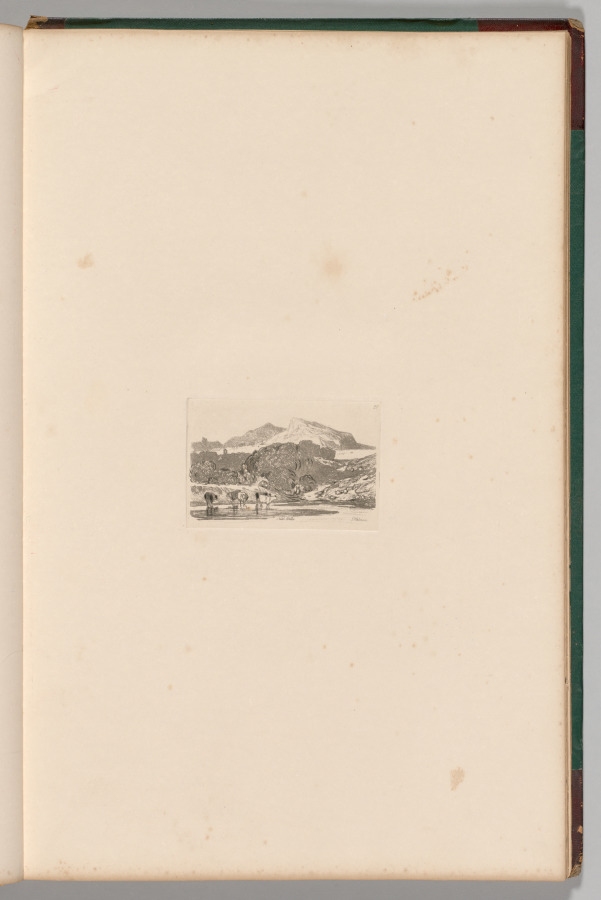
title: Liber Studiorum: Plate 21, View in North Wales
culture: England, 19th century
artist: John Sell Cotman (British, 1782–1842)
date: 1838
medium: softground etching, from a bound volume containing 48 plates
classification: Bound Volume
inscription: In plate, within image, upper right: 21; in plate, below image: North Wales JS Cotman